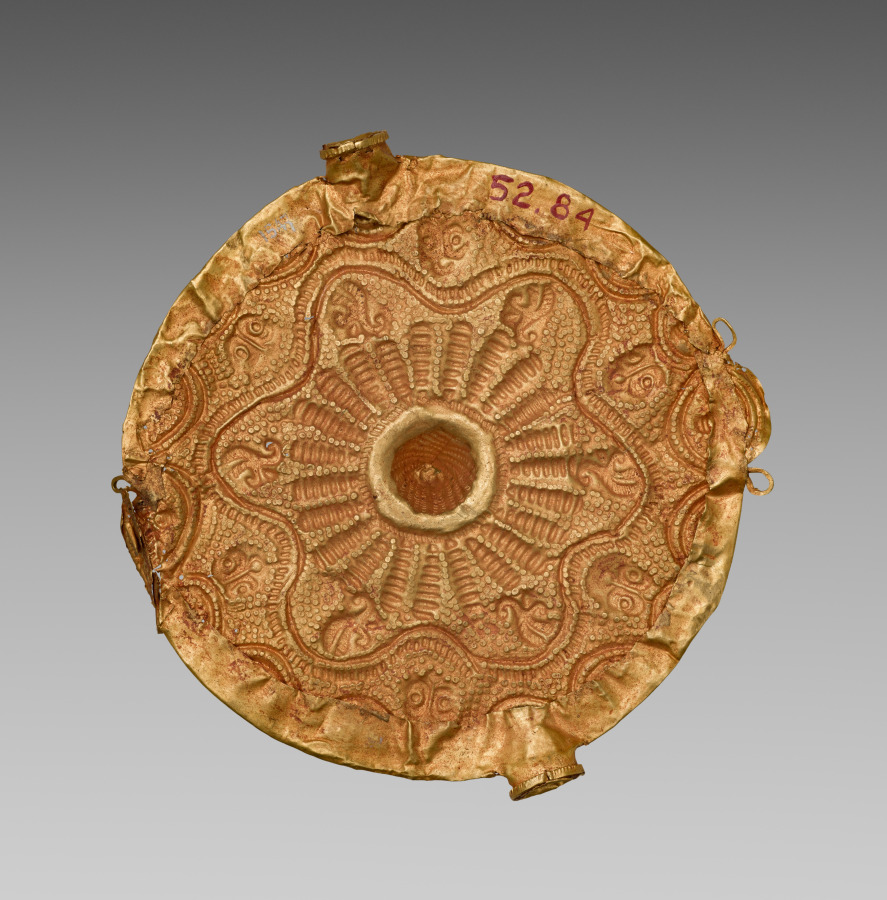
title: Disk Pendant (akrafokɔnmu)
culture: Africa, West Africa, Ghana, Asante Empire/ Kingdom, member of the goldsmiths’ guild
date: 1800s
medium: Gold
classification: Jewelry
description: Gold discs dangling on the chests of Akan state officials and elites showed their rank and duties. Worn by these akrafo (“soul people”) since the 1800s, they are often linked to kradware, officials who represent and purify (“wash”) the king’s soul. To make them, goldsmiths cast or flattened gold. Muslim North African gold coins likely inspired their form and material, while concentric water rings influenced their composition. This small disc is typical of pre-colonial examples. Gold ornament making ceased until 1924; court officials now wear large discs.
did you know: Gold miners from the Akan region once mined gold to make local objects like this and to supply gold for trade across trans-Saharan routes and into places as far away as Europe.